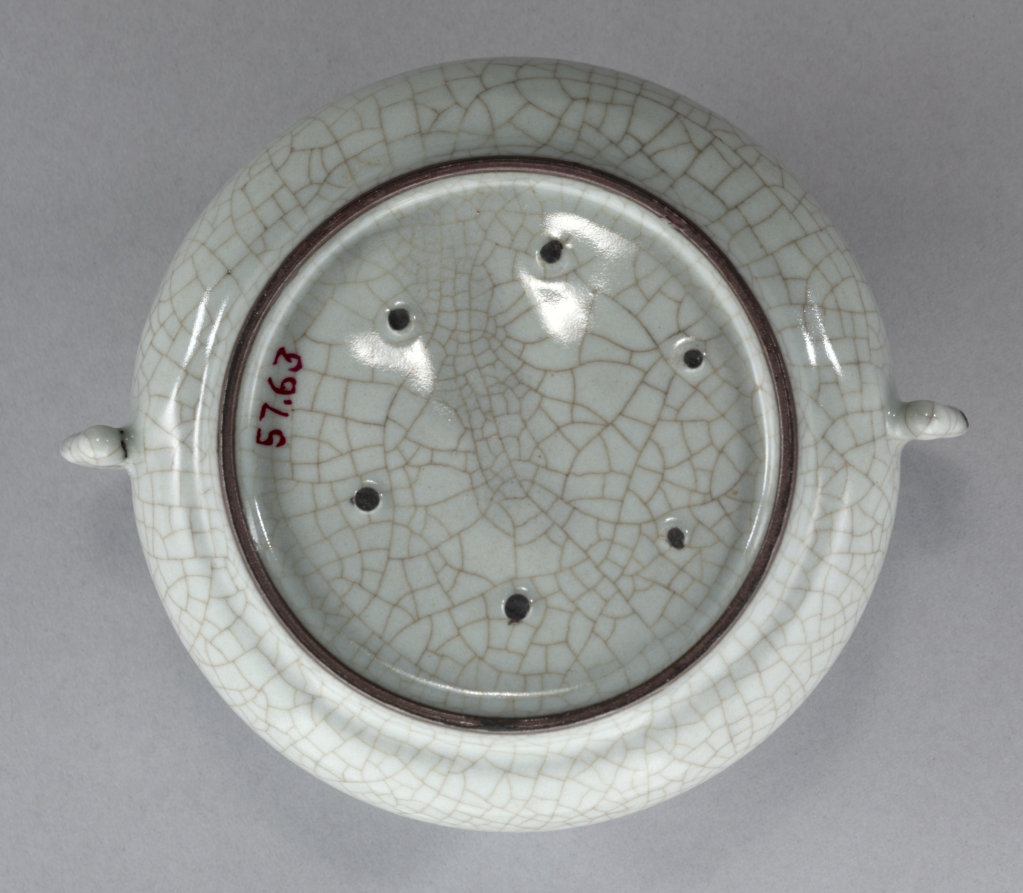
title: Incense Burner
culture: China, Zhejiang province, Hangzhou, Southern Song dynasty (1127-1279)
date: 1200s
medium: porcelaneous stoneware, Guan ware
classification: Ceramic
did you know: There are six spur marks on the incense burner's glazed base.